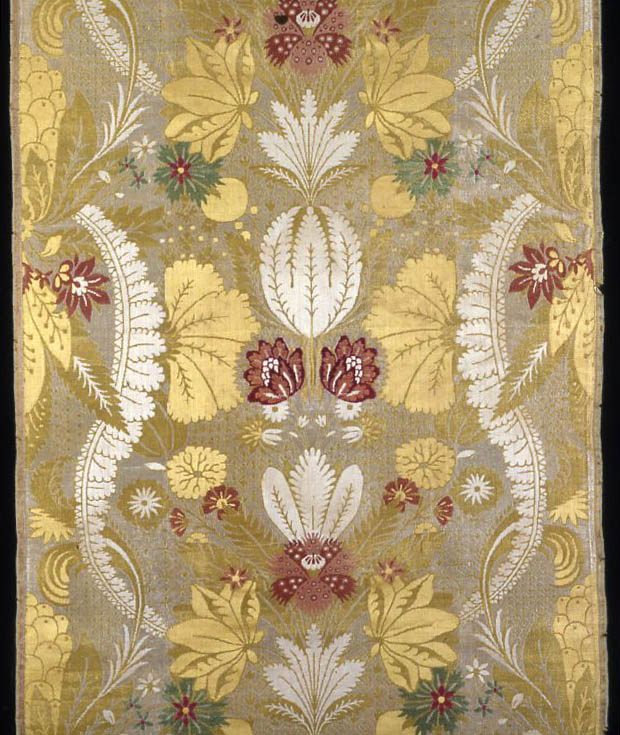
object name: Textile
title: Panel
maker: England, Spitalfields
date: 1720/25 (probably 1723/24)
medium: Silk, warp-float faced 7:1 satin weave with supplementary binding warps tying supplementary brocading wefts and self-patterning ground wefts in weft-float faced 3:1 twill interlacing; two panels and one fragment pieced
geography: England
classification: textile; weaving